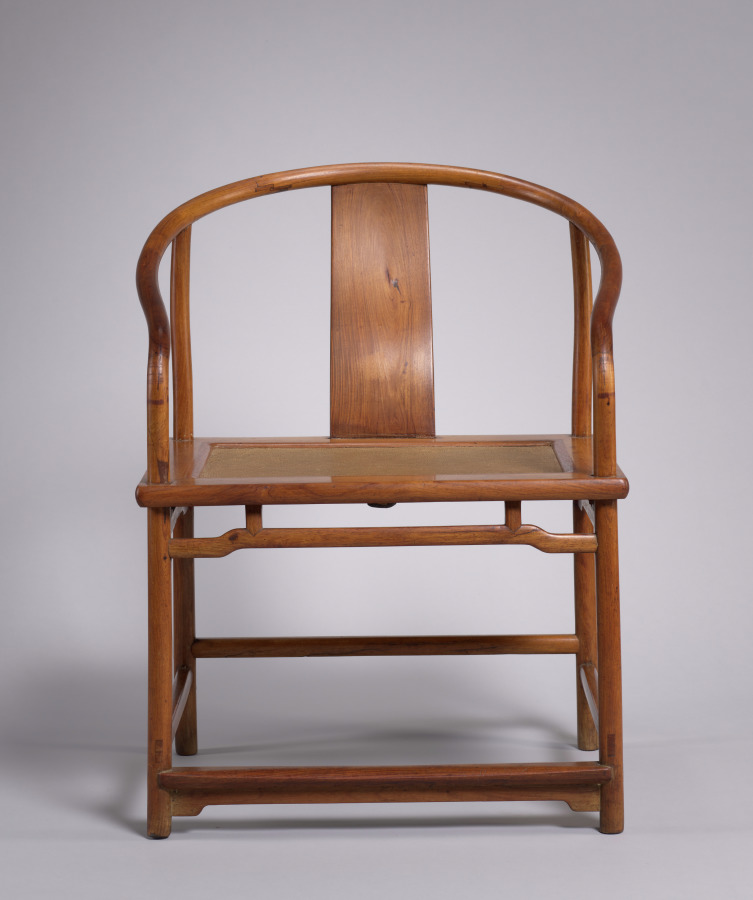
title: Roundback Armchair: Lohan Type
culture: China, Ming dynasty (1368–1644) to Qing dynasty (1644–1911)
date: 1600s–1700s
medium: Rosewood (huanghuali)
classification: Furniture and woodwork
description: In history, China moved from an original floor culture to high chairs and tables, developing a unique tradition of craftsmanship. Although still relatively unexplored, the manufacturing and styles of furniture differ by region. This horseshoe-back armchair was made in Jiangsu province. Its simplicity and minimalist elegance is characteristic of Suzhou-style furniture and aesthetics. The back of the chair is made of seven pieces of wood, joined and secured with an inserted wooden pin, a mortise-tenon technique that appeared in its earliest form in Neolitihic fragments of the Hemudu culture.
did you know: The horseshoe-shaped back of this chair is joined without glue or nails.